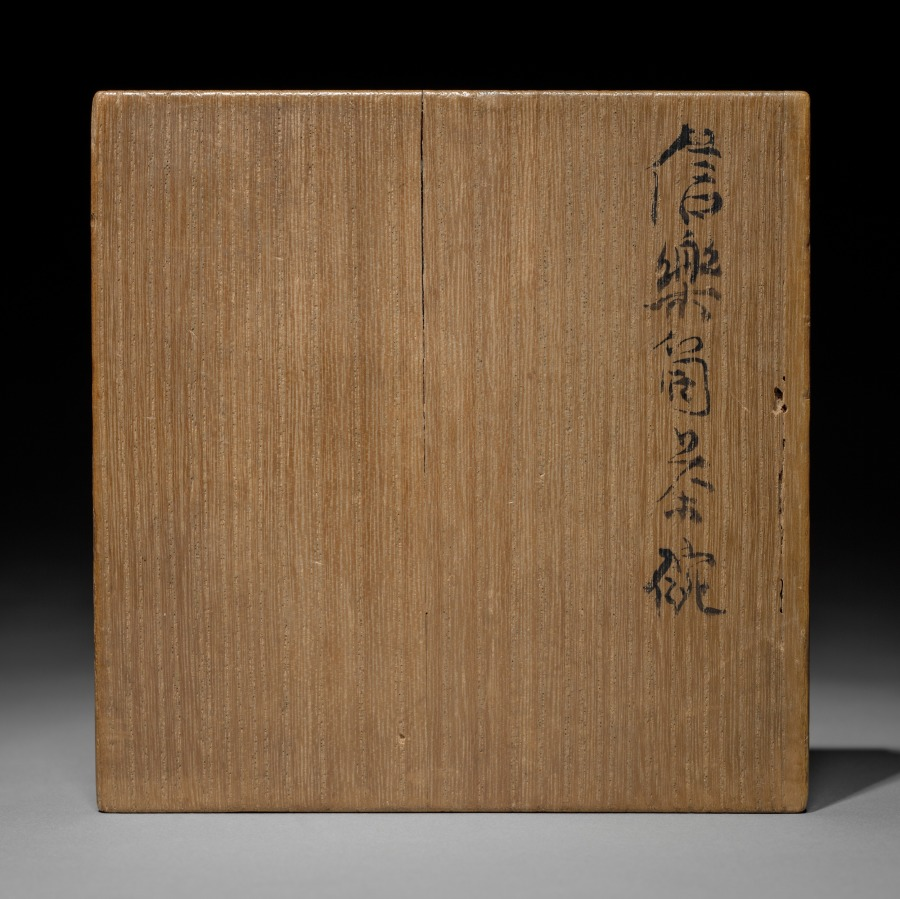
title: Tea Bowl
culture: Japan, Edo period (1615–1868)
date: 1600s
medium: stoneware with natural ash glaze (Shigaraki ware)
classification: Ceramic